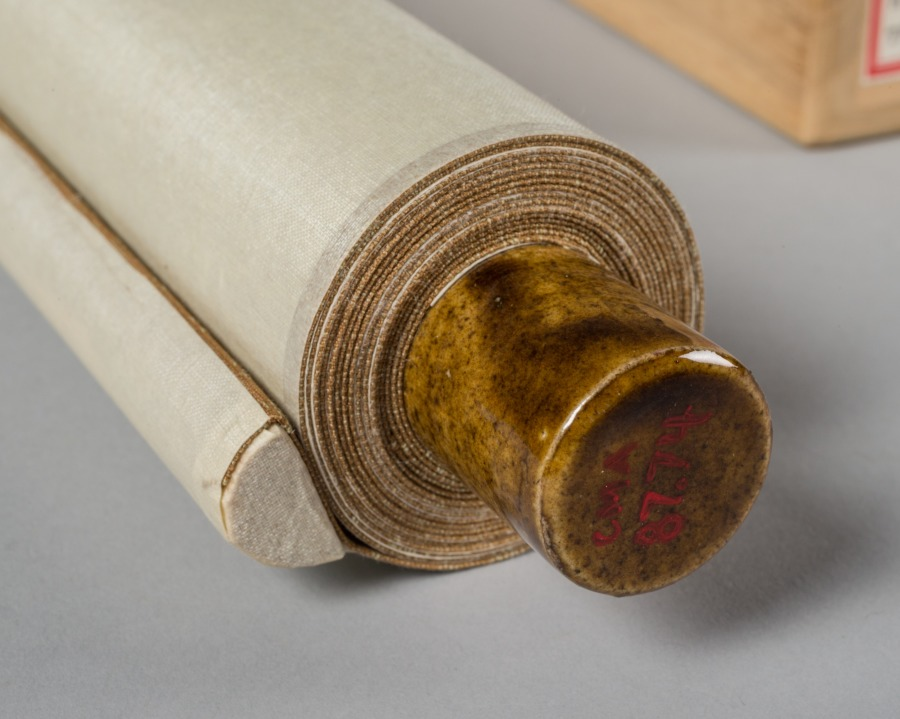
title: Genre Figures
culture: Japan, Edo period (1615–1868)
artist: Takebe Sōchō (Japanese, 1760–1814)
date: c. 1816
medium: hanging scroll; ink and color on paper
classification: Painting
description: Though rarely mentioned in official histories, Socho was an accomplished painter whose talent is readily apparent to the modern eye. For his compositions he chose traditional Japanese stories or everyday events. This painting belongs to a triptych (set of three) that was recently converted from folding screen panels to hanging scrolls.